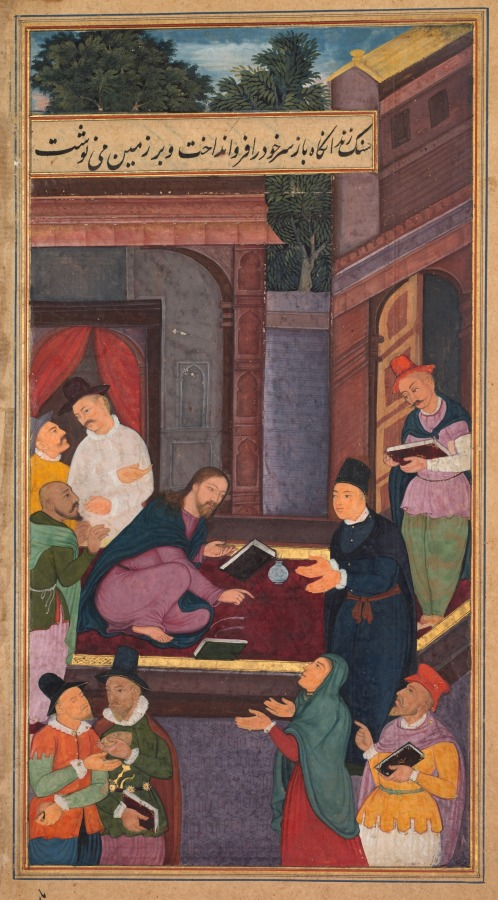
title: Jesus writes on the ground (folio 130 verso), from a Mirror of Holiness (Mir’at al-quds) of Father Jerome Xavier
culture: Mughal India, Allahabad, made for Prince Salim (1569–1627)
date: 1602–4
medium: Gum tempera, ink, color, and gold on paper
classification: Manuscript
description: As Jesus was debating with the scribes and Pharisees in Jerusalem, they brought before him an adulterous woman. Hoping to incite him to violence, they declared that if Jesus followed the law of Moses, he should order her to be stoned to death. Jesus responded, “Let whichever of you is without sin cast the first stone.” Then he began to write with his finger on the ground, and each of the men saw a description of his own sins. The two men in the bottom corner of the painting clutch stones with expressions of doubt, fear, and disgust. The adulteress in the red dress holds out her hands in supplication.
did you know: The adulteress wears a red dress, gold rings, and a necklace under her stole.